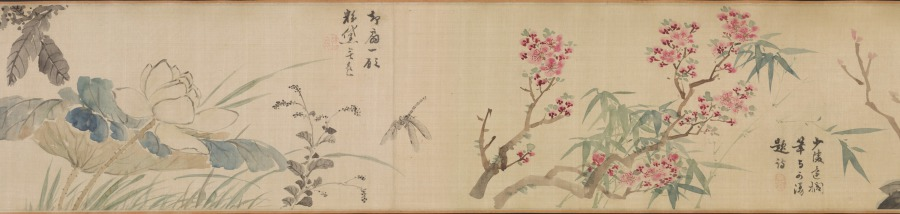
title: Flowers of Four Seasons, with Poems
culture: China, Ming dynasty (1368–1644)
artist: Wang Guxiang (Chinese, 1501–1568)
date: 1531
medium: handscroll; ink and light color on silk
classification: Painting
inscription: Artist's inscription, signature, and 15 seals. Ink Orchids. Sewn as pendants for the man of worth, swaying quiety, fragrance in the valley. [seal] Hsiao-chu ts'un Peony. Wiping his face, the young gentleman Ho [Ho Yen of Wei, Three Kingdoms] appears to have been powdered. His previous life was the perfume-stealing Han Shou [of Chin, 265–419 CE], the fragrance still lingers. [seal] Ts'un-wu chai. Flowering Crab Apple, New Bamboo. Shao-lin [Du Fu, 712–770] had to put down his brush. [Flowering Crab Apple]. Yü-k'o [Wen T'ung, d. 1079) in vain wrote poems about [Bamboo]. [seal] Yu-shih. Lotus Flowers. When she turns her head, half-hidden by a fan, and casts a glance, all the beautiful women become colorless. [seal] K'ang yüeh huai. Loquat. Ripeness in summer. [seal] Lu-chih. Pomegranate Flower. Whenever I remember you I will send my thoughts, but where have you gone--the [skirt] of pomegranate red? [seal] Wu-ho Sheng. Day Lily. Plant the day lily to forget sorrow. [seal] Yu-shih. Chrysanthemum. The untrammelled joy at the eastern fence. [seal] Lu-chih. Begonia. Comparing it to the beauties of Spring, and spreading them out as trimming for the stone steps. [seal] Yu-shih. Hibiscus. In recent years I have always enjoyed looking at flowers; instead of dark red I preferred pink ones. [seal] Jen-sheng i-lou. Narcissus, Camellia. The jade girdle left behind at Lo River. [Narcissus]. The precious pearls glitter before Spring. [Camellia]. [seal] Lu-chih. Heavenly Bamboo (Nandina domestica). A single branch in the wintry season. [seal] K'ang yüeh huai. Plum. Fragrant snow in the Lo-fou Mountains. [seal] Ts'un-wu chai. In the eleventh lunar month of the hsin-mao year of the Jiaqing era [1531], [I] imitated the boneless style of Yüan masters in sketching from life. Guxiang [seals] Yu-shih; Lu-chih. Translated by Wai-kam Ho/Lingyun Shih Liu (1980)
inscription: 2 colophons and 23 additional seals: 1 colophon dated 1632, and 2 seals of Li Jih-hua [Li Rihua] 李日華 (1565–1635); 1 colophon and 2 seals of Xiang Shengmo 項聖謨 (1597–1658); 3 seals of Liang Qingbiao 梁清標 (1620–1691); 6 seals of the Jiaqing 嘉慶 emperor (r. 1796–1820); 9 seals of Ch'eng Ch'i [Cheng Qi] 程琦 (1911–1988)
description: In this painting, flowers are loosely arranged by the seasons: narcissus and peony represent early spring; yellow loquat and lotus, summer; chrysanthemum, autumn; and the plum and evergreen bamboo, winter. The artist added to each flower a poetic line of calligraphy associating each plant with a historic or legendary figure. For example, the chrysanthemum, along with the line “The untrammeled joy at the eastern fence,” refers to the poet Tao Yuanming (died AD 427) who enjoyed chrysanthemums at the eastern fence in his garden. The scroll illustrates Wang Guxiang’s mastery of free brushwork, combining light monochrome ink with transparent colors. In his inscription, Wang says he used the “boneless” style without outlines as developed during the Yuan dynasty (1279–1368). Wang was a native of Changzhou, a city in southeast China known for its rich flora and fauna, and flower-and-bird painting tradition.